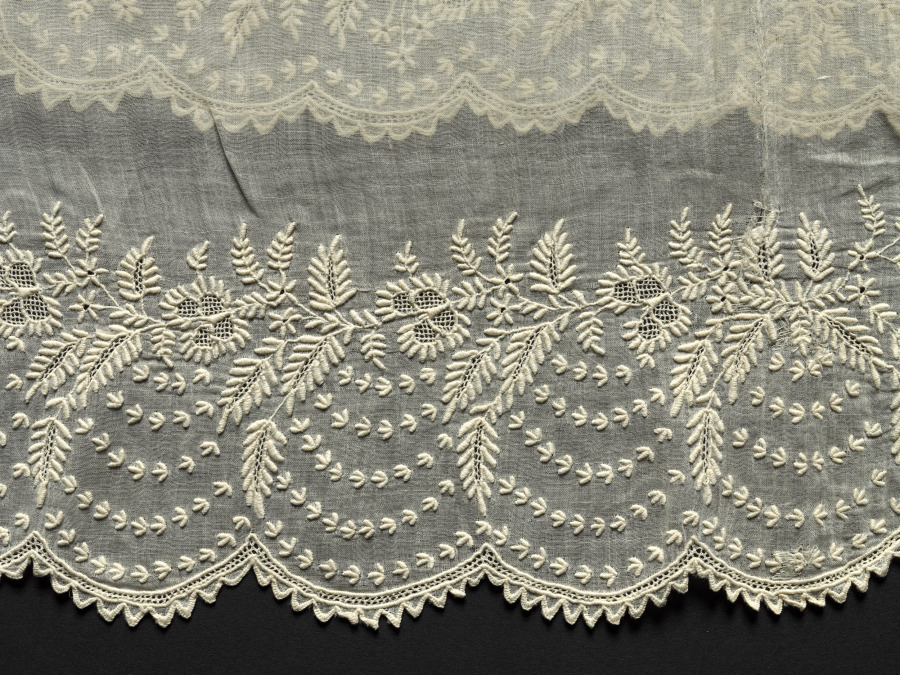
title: Double Collar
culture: United States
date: 1830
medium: Plain weave cotton, embroidered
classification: Embroidery